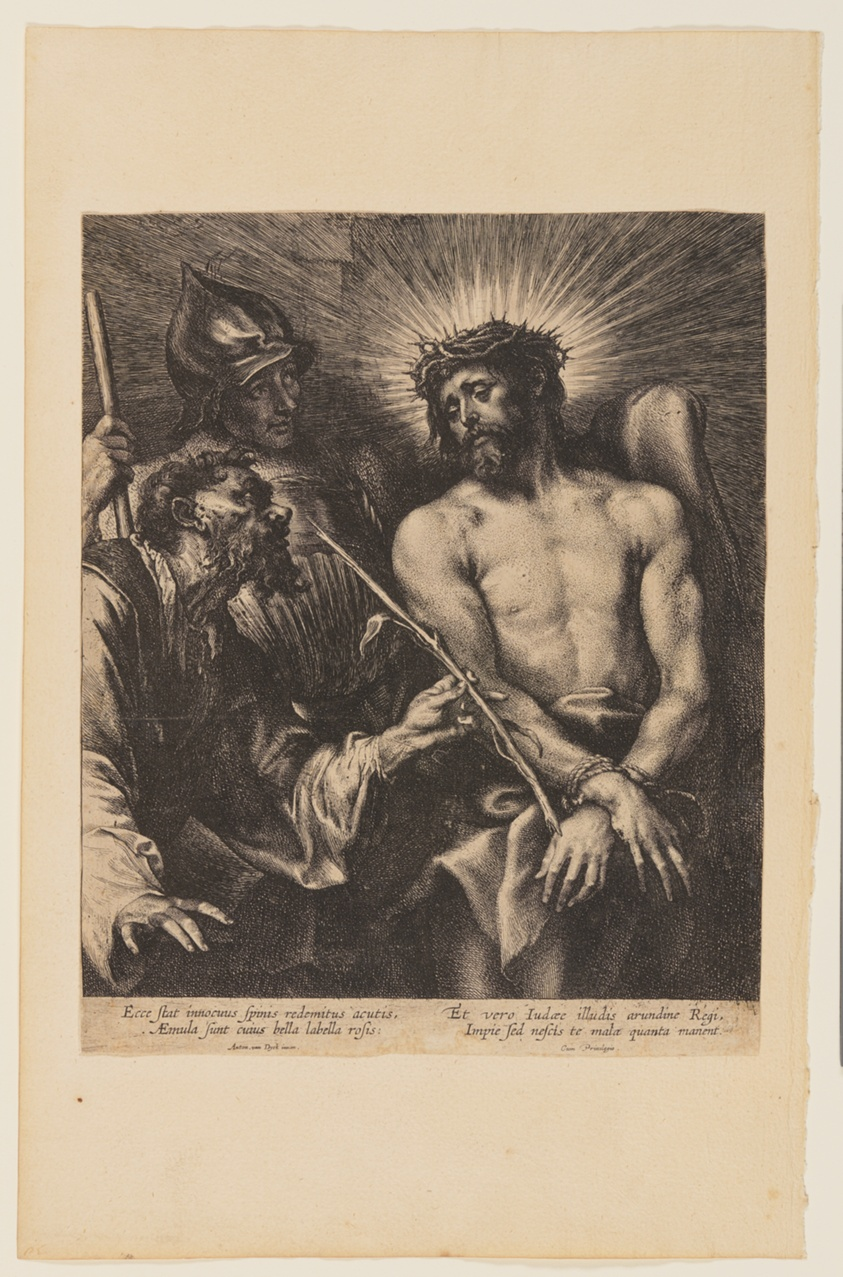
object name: Print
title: Christ Crowned with Thorns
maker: Anthony van Dyck (Flemish, 1599–1641)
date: c. 1630-40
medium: Etching on ivory laid paper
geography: Flanders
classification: print; paper; prints and drawing; etching